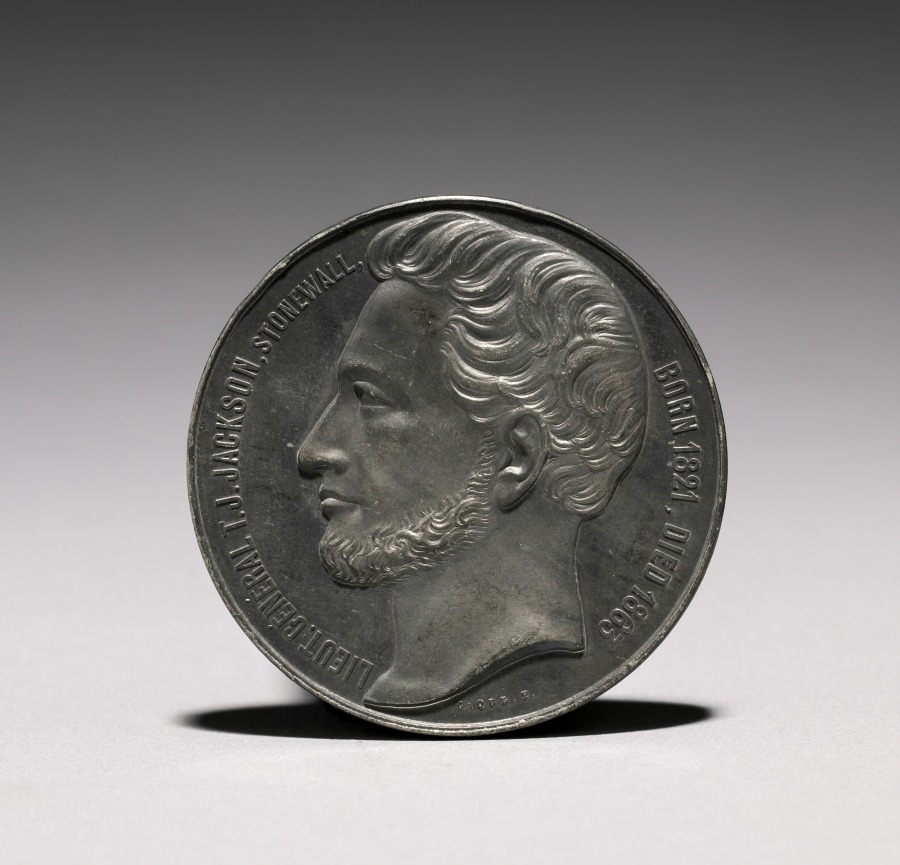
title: Medal: Lieutenant General T. J. Jackson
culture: France, 19th century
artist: Armand Auguste Caqué (French, 1793–1881)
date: c.1824–63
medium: bronze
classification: Metalwork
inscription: Lieut. General T. J. Jackson, Stonewall. Born 1821. Died 1863.